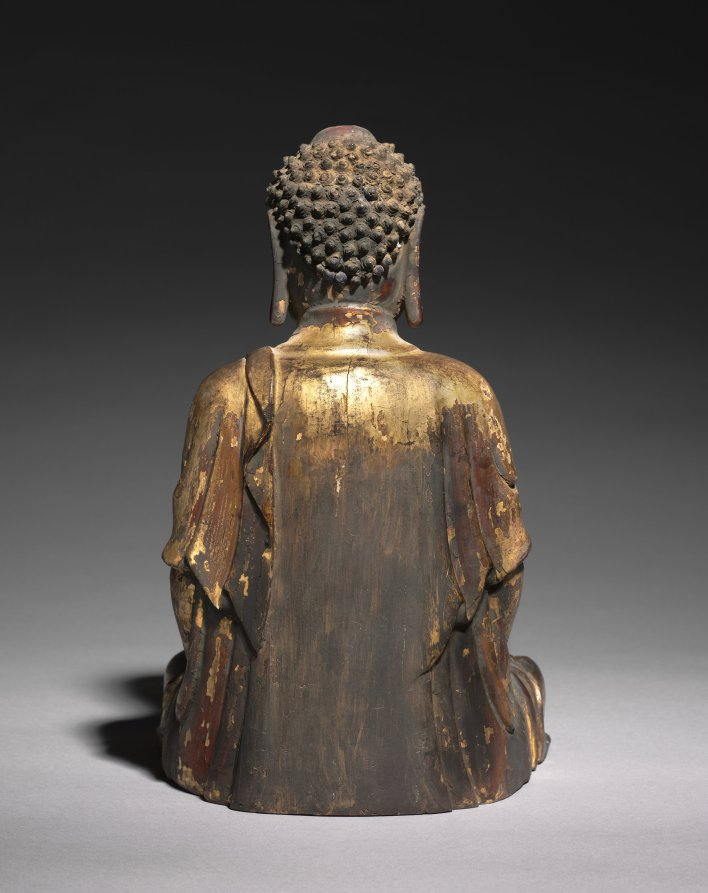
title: Seated Amitabha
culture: Korea, Goryeo dynasty (918–1392)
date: 1300s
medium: wood with lacquer and gilding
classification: Sculpture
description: In Buddhist art, buddhas (supreme beings who entered the world of nirvana) and bodhisattvas (compassionate beings committed to the attainment of enlightenment for others) are two main subjects. The religious role of buddhas and bodhisattvas—to lead all sentient beings to the realm of Buddhahood—is the same, yet visual languages to represent them is different. As shown in this statue, the Buddha is represented as a monk with shaven head and dressed in simple monastic robes. Bodhisattvas, on the other hand, are adorned with elaborate jewelry and a lock of long hair.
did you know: This Buddhist statue was donated to the museum in memory of Godfrey St. G. M. Gompertz (1904-1992), a pioneering scholar and collector of Korean art, in particular in the area of Goryeo-period celadons.